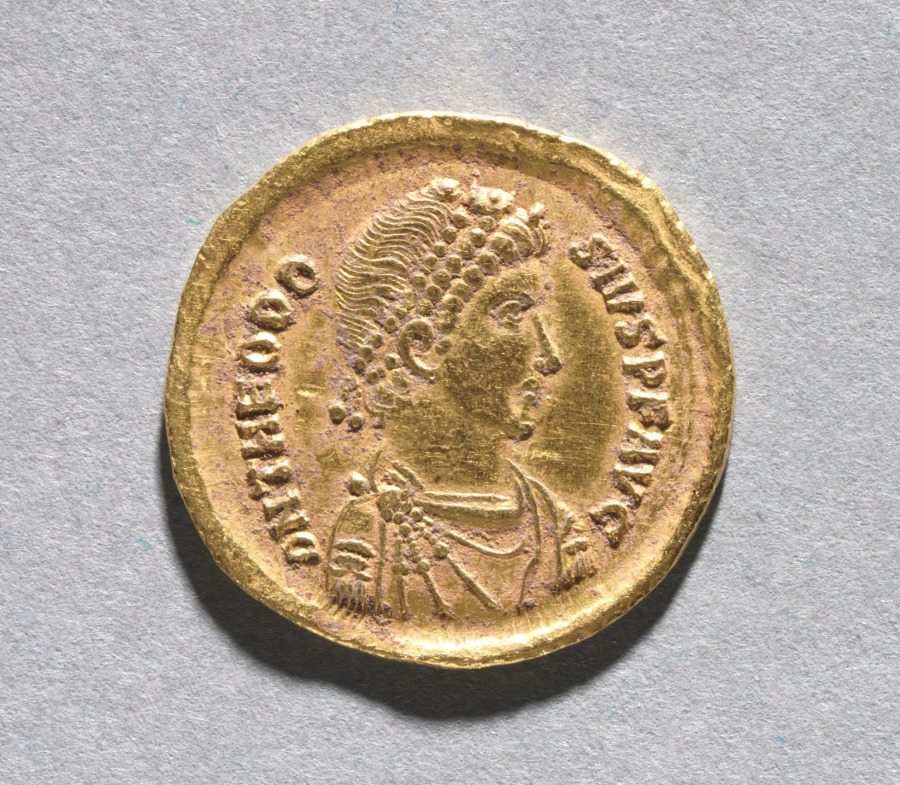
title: Solidus of Theodosius I the Great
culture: Byzantium, Constantinople, Byzantine period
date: 383–88 CE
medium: gold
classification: Coins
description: Byzantine Gold Coins The vast number of surviving Byzantine coins attests to the level of trade across the empire. Controlled and supervised by the emperor, the producers of coins took care to represent his authority and reflect his stature. Talented artists were recruited to engrave the dies (molds) used for the striking of coins. Emperors increasingly came to include their heirs and co-emperors on their coinage, as well as other family members or even earlier rulers. Coins were recognized, then as now, as small, portable works of art. With their inscriptions and images, Byzantine coins provide valuable documentation of historical events and a record of the physical appearance of the emperors. The coins shown here include the solidus, the basic gold coin of 24 karats; the tremissis, a gold coin of one-third the weight and value of the solidus; and the nomisma, which in the 10th century replaced the solidus as the standard gold coin.